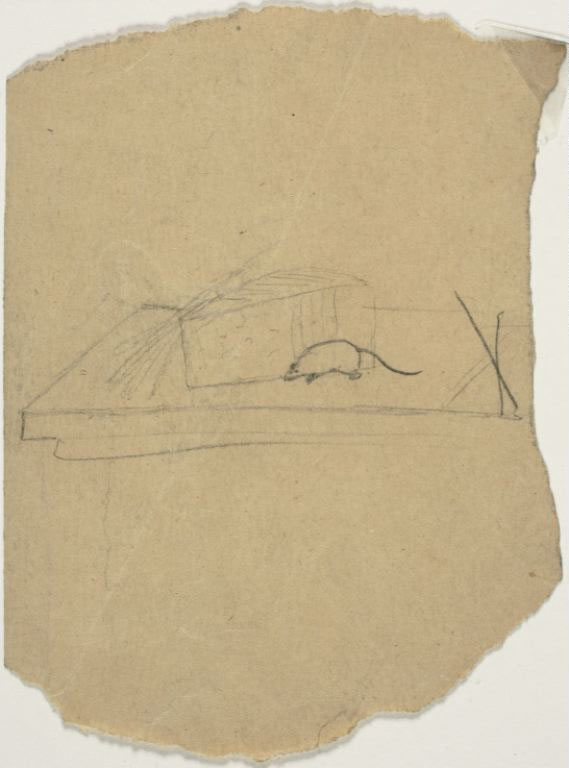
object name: Drawing and Watercolor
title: Thieves in the Pantry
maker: William Michael Harnett (American, born Ireland, 1848-1892)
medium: Graphite on tan wove paper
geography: United States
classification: graphite; drawings (visual works); prints and drawing